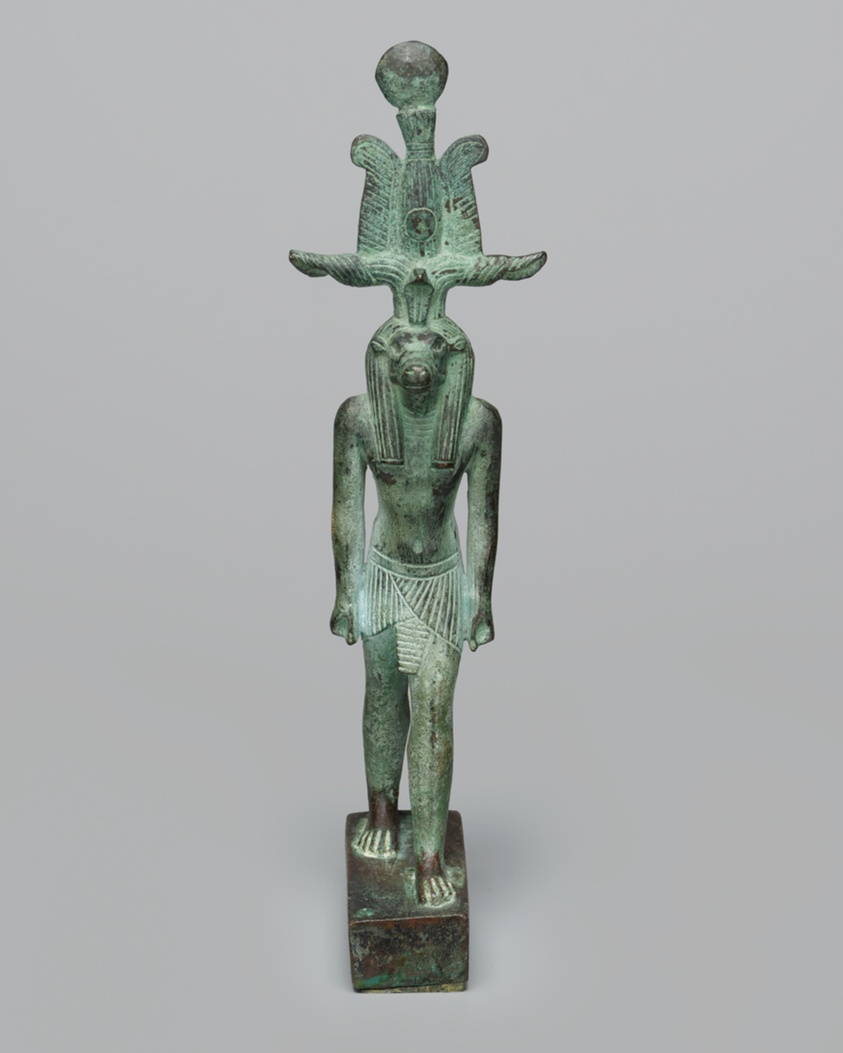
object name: Sculpture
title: Statuette of Sobek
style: late period (egyptian), ancient, egyptian, thirtieth dynasty, twenty-eighth dynasty, twenty-ninth dynasty, twenty-seventh dynasty, twenty-sixth dynasty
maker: Egyptian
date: Late Period, Dynasty 26–30, 664–332 BCE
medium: Copper alloy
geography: Egypt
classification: statuette; bronze; metal; sculpture; ancient art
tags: gods (deities), crowns, crocodiles